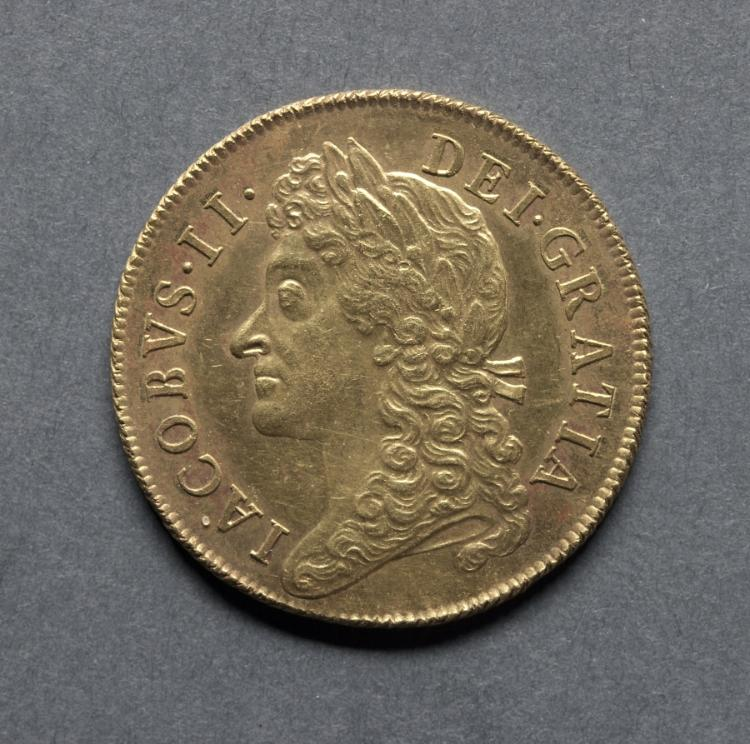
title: Two Guineas: James II (obverse)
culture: England, James II, 1685-1688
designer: John Roettier (British, 1631–1703)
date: 1687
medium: gold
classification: Coins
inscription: DEI . GRATIA . IACOEVS . II .